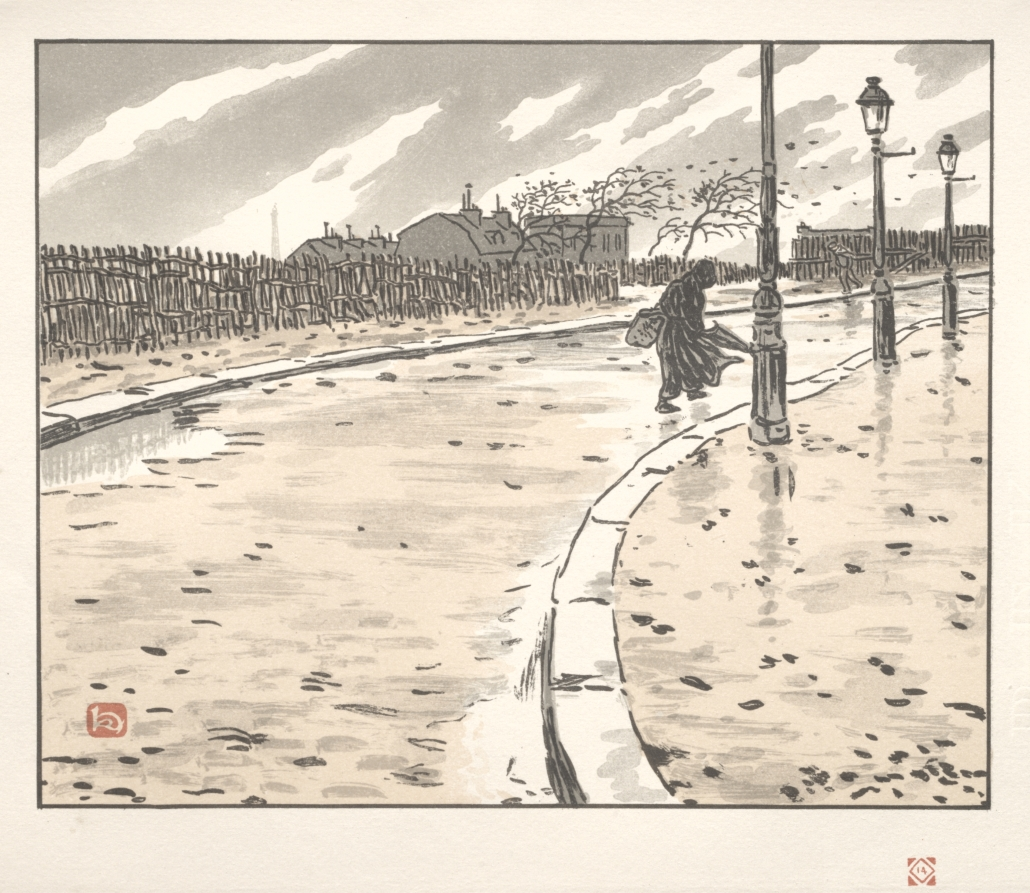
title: Thirty-Six Views of the Eiffel Tower: From Lamarck Street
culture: France, early 20th century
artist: Henri Rivière (French, 1864–1951)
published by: Printed by Verneau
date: 1902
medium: color lithograph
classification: Print